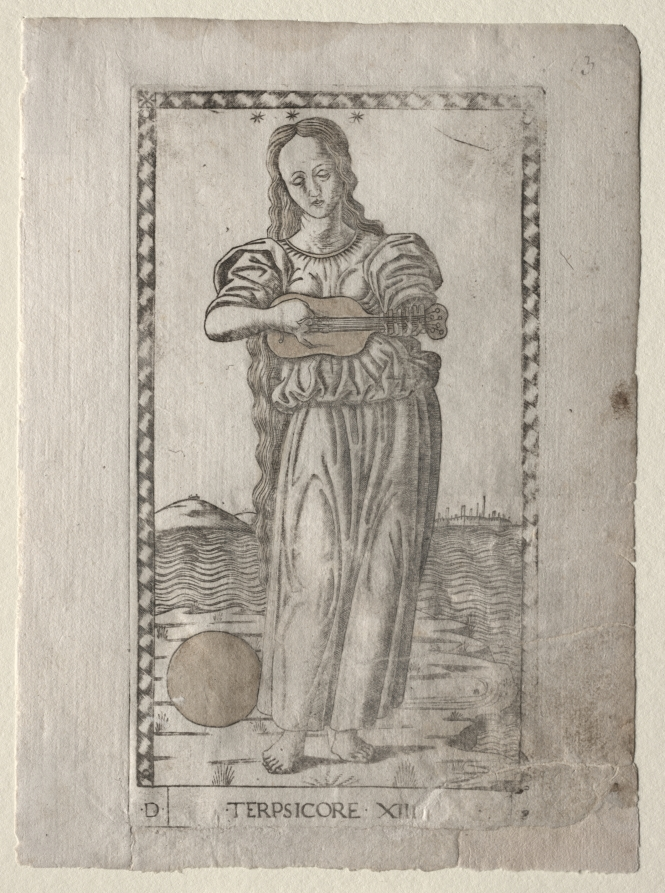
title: Terpsichore (dancing and song) (from the Tarocchi series D: Apollo and the Muses, #13)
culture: Italy, Ferrara, 15th century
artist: Master of the E-Series Tarocchi (Italian, active 1460s)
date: before 1467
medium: engraving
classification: Print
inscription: Lettered below the image of Terpsicore (Terpsichore): ·D· / ·TERPSICORE·XIII / [13]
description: This engraving is part of the Tarocchi group marked with the letter “D,” and named Apollo and the Muses. In Greek mythology, the nine Muses (Calliope, Urania, Terpsichore, Erato, Polyhymnia, Thalia, Melpomene, Euterpe, and Clio) were the daughters of Zeus, king of the gods, and Mnemosyne, the Titaness of memory. The Muses were goddesses presiding over different branches of the arts and sciences. Their leader and supervisor was Apollo, the god of light, music, prophecy, and poetry. Here, Terpsicore (Terpsichore) is personified as a full-length female figure, in frontal view, set in an imaginary landscape by the sea. She is playing an instrument, likely a medieval guitar. Terpsichore was regarded as the Muse of dancing and songs.